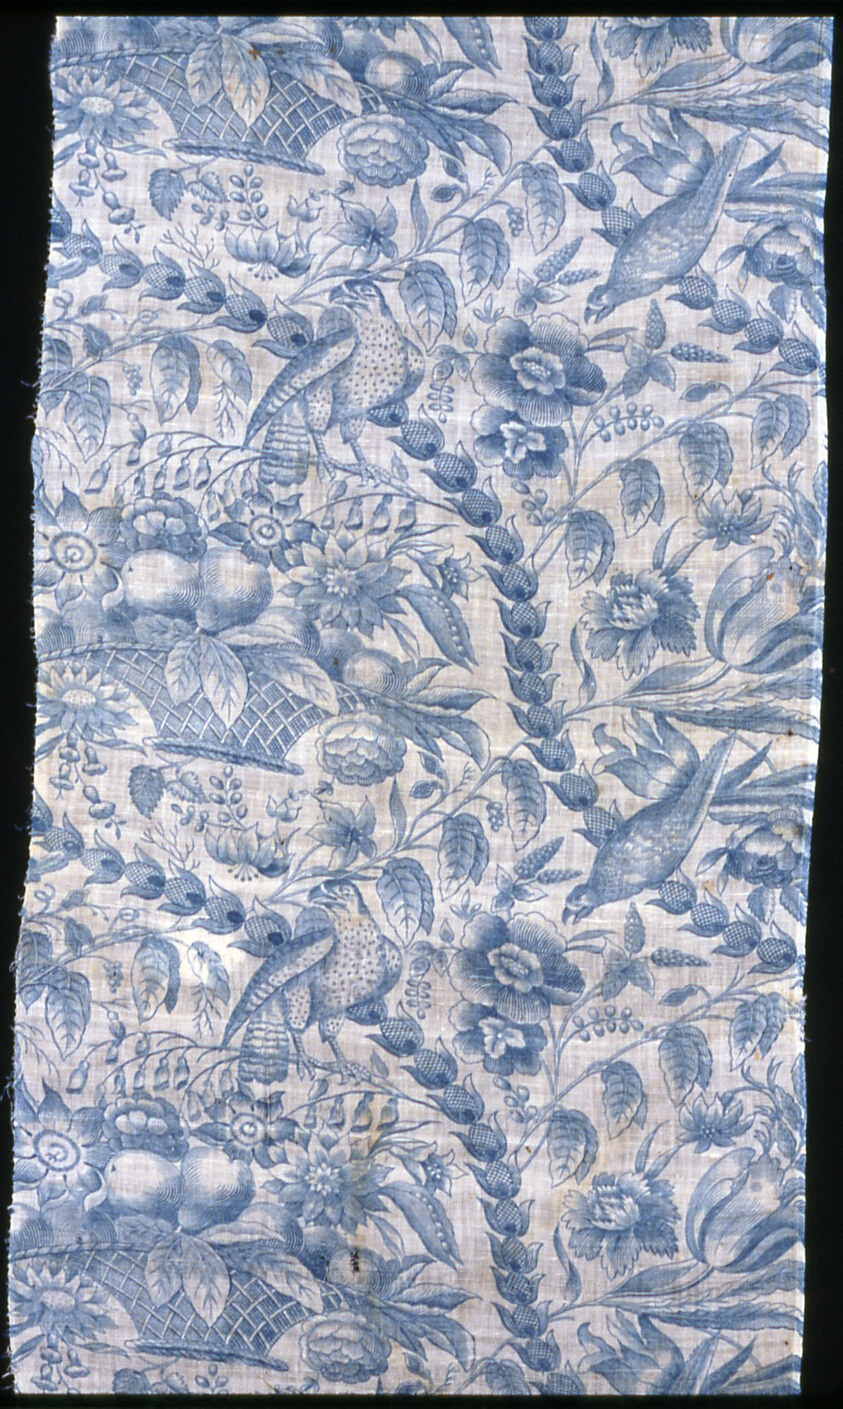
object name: Textile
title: Panel (Furnishing Fabric)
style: chinoiserie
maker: England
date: c. 1815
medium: Cotton, plain weave; engraved roller printed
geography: England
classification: textile; weaving - printed; furnishing textile